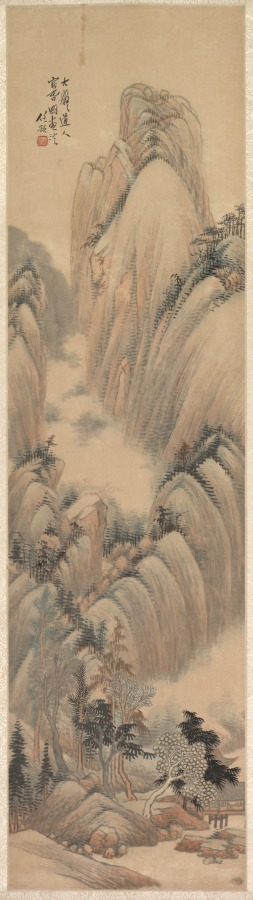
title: Landscapes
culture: China, Qing dynasty (1644-1911)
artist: Ren Yu (Chinese, 1853–1901)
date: 1892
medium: Set of four hanging scrolls; color on paper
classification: Painting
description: This set of four seasonal landscape hanging scrolls are by Ren Yu. He was the youngest, most eccentric, and least prolific of the Four Rens, a family of prominent painters in Shanghai during the late Qing dynasty (1644–1911). Perhaps due to his opium habit and subsequent financial difficulties, Ren Yu tended to be lackadaisical in his work. The few remaining high-quality paintings hint at his artistic potential lost to opium. Though Ren’s premature death left his artistic promise unfulfilled, his paintings were acquired and donated to the museum by Charles Lang Freer (1854–1919), a wealthy businessman and art collector from Detroit. As Freer had hoped, this donation of Ren Yu paintings inspired the young Cleveland Museum of Art to continue to expand its own Chinese painting collection.